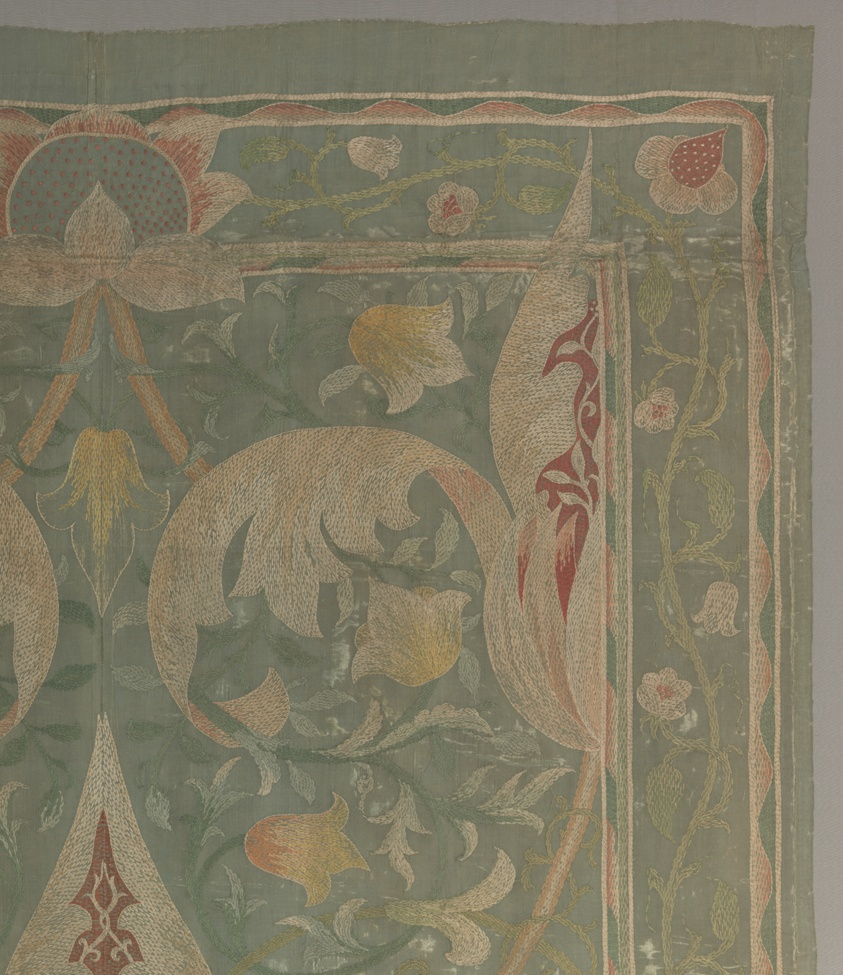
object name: Textile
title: Lotus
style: Arts and Crafts Movement, british, 19th century, British Arts and Crafts Movement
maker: Design attributed to May Morris (English, 1862–1938); Produced by Morris & Co., London (English, 1875–1940); Embroidered by the Decorative Arts Society, Chicago (American, founded 1877)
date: Design by 1888, made 1888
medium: Silk, warp-float faced twill weave; embroidered in satin and stem stitches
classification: textile; needlework (visual works)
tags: floral, lotus